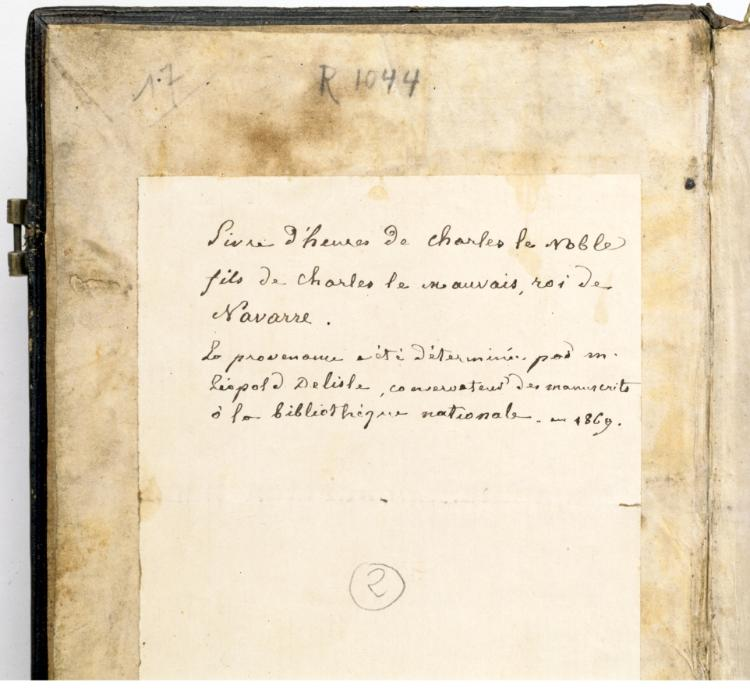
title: Hours of Charles the Noble, King of Navarre (1361-1425)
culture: France, Paris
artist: Master of the Brussels Initials and Associates (French)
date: c. 1404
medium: ink, tempera, and gold on vellum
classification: Bound Volume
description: Creating a book of hours was an arduous and costly process. These books were made from vellum, animal skins that were laboriously prepared in a multistep process. The texts were written with a quill pen and the illustrations were hand painted using water-based pigments. Gold was added for a look of great luxury. Such a book would take years to create, making these valuable objects unique.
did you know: King Charles the Noble likely used this book of hours at his royal castle of Olite in Navarra in northern Spain.